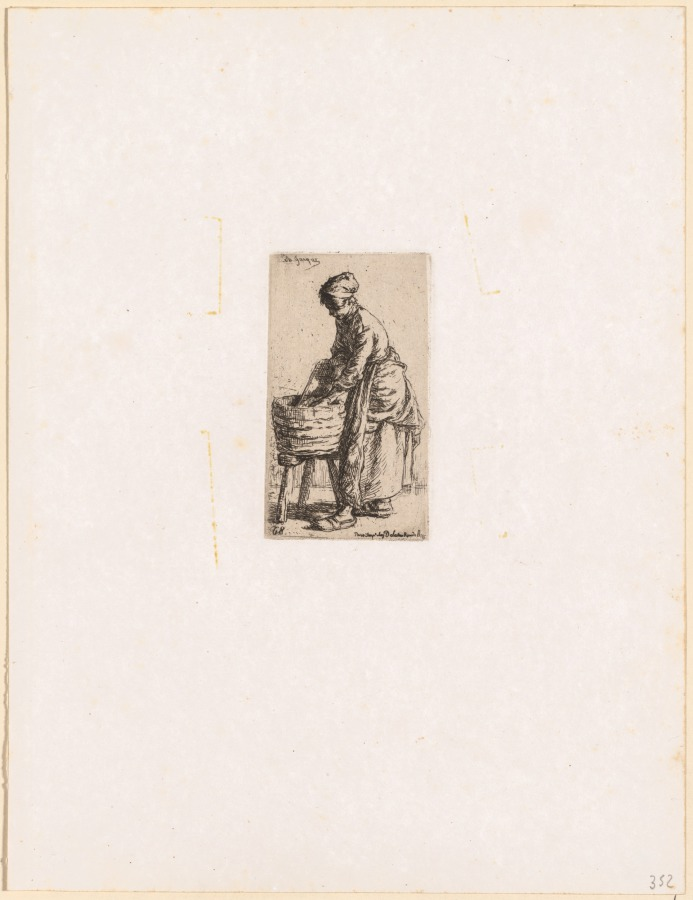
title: Washerwoman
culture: France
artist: Charles-Émile Jacque (French, 1813–1894)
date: 1850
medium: Etching and drypoint on chine collé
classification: Print